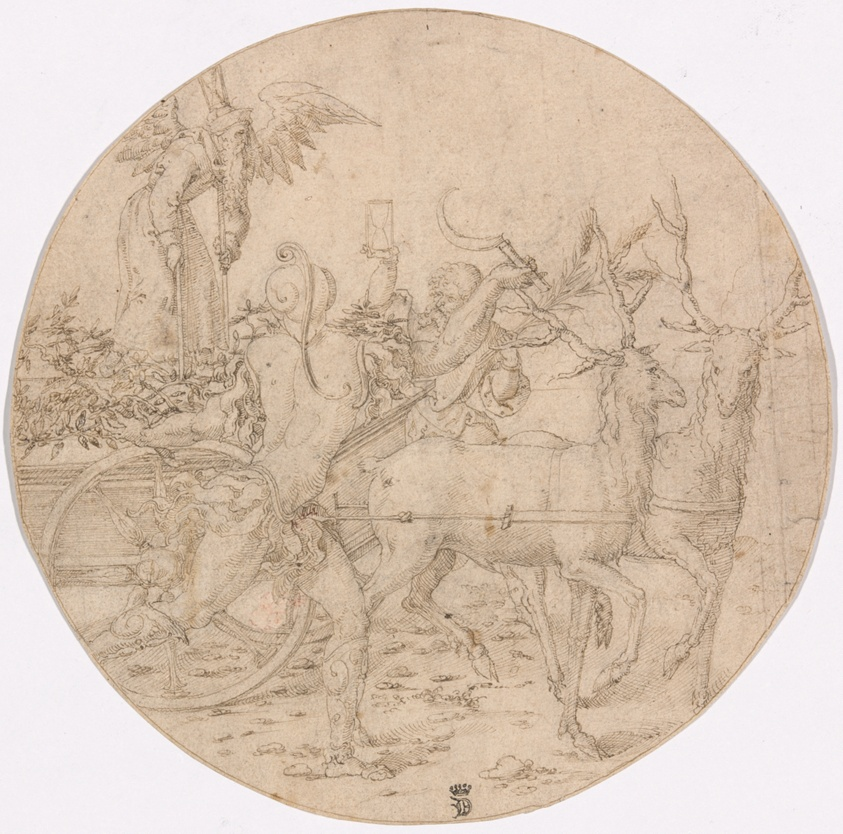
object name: Drawing and Watercolor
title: The Triumph of Time (recto); Sketch of a Stag (verso)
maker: Style of Dirk Vellert (Netherlandish, active 1511-1544)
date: c. 1517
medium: Pen and brown ink, over traces of black chalk, on cream laid paper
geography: Netherlands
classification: pen and ink drawings; drawings (visual works); prints and drawing